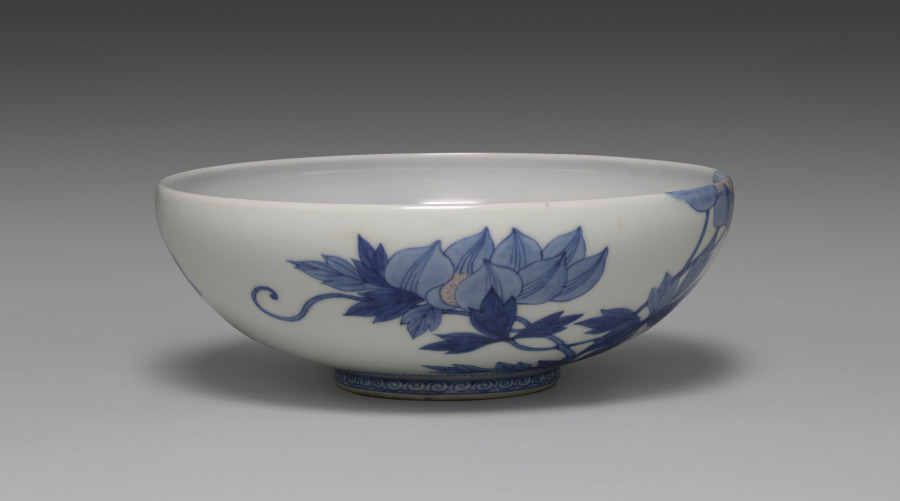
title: Dining Bowl with Clematis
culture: Japan, Meiji period (1868–1912)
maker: Seifū Yohei III (Japanese, 1851–1914)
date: 1893–97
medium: Porcelain with underglaze and overglaze colors, molded and incised designs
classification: Ceramic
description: The bowl is an especially well-executed example of Yohei III’s work in underglaze blue combined with other underglaze colors. This low-profile dining bowl has paintings of flowering clematis vines under the glaze in blue and red. Water is depicted with blue in the bottom of the bowl. The lines of white used to show motion on the water’s surface were created using either a reserve technique, where blue was omitted, or a masking technique, where parts of the surface were covered before applying the blue. A pair of butterflies flutters across one side. The foot is decorated with a pattern of spirals in blue, and the lip curves in slightly. The overall effect is one of seeing the flowering vine hanging down, hovering just above the surface of a pond, whose slight disturbances hint at unseen fish swimming below.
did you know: This bowl shows an environment painted in the round.